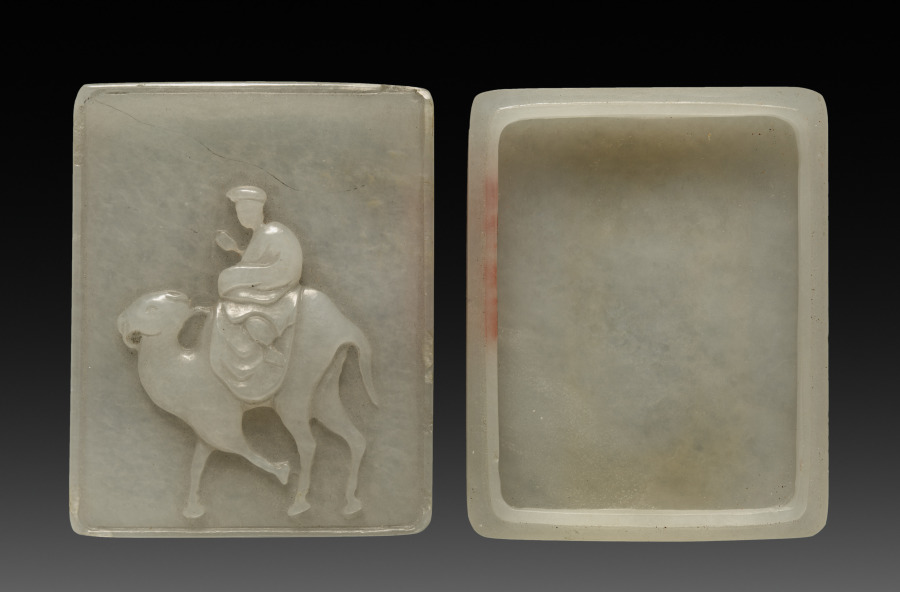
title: Seal Box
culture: China, Qing dynasty (1644-1911)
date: 1644–1700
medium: jade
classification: Jade